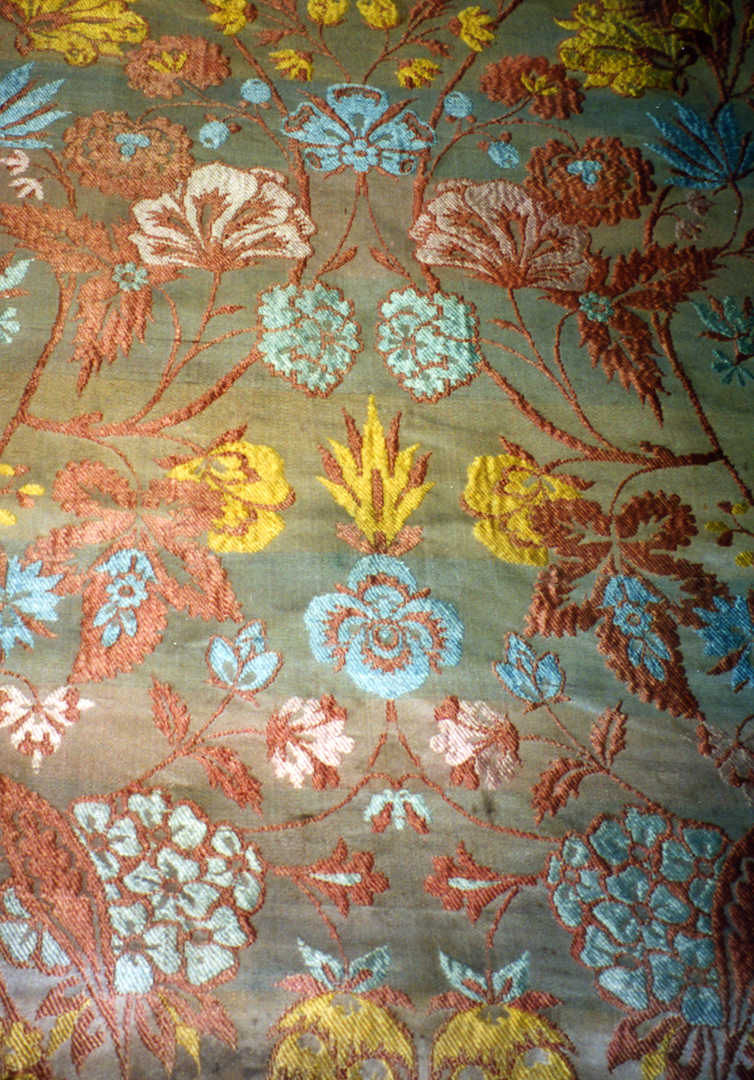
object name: Textile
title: Panel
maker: Probably the Netherlands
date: c. 1720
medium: Silk, warp-float faced 4:1 satin weave self-patterned by ground wefts bound in weft-float faced 1:4 twill interlacings by main warp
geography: Netherlands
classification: textile; weaving